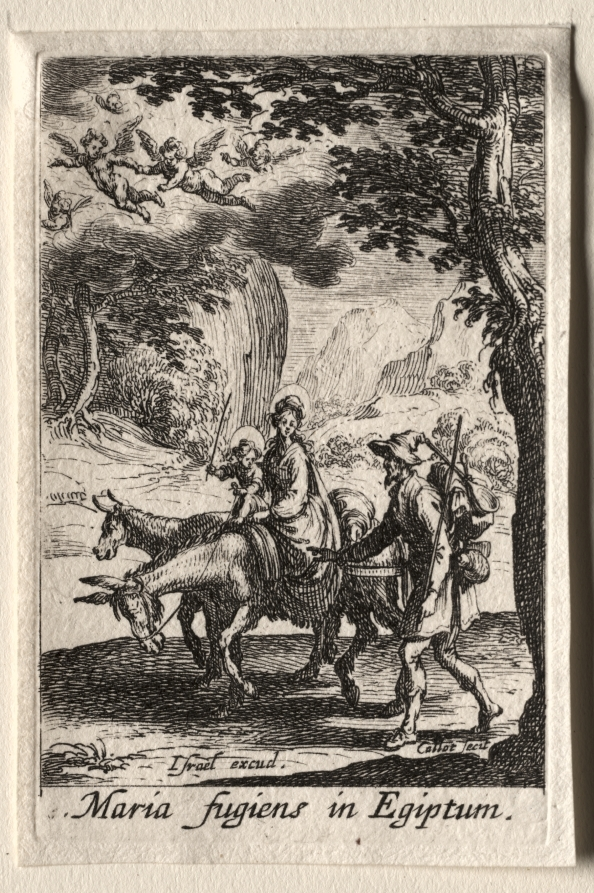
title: The Life of the Virgin: The Flight into Egypt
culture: France, 17th century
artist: Jacques Callot (French, 1592–1635)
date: ca. 1633–34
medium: etching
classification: Print